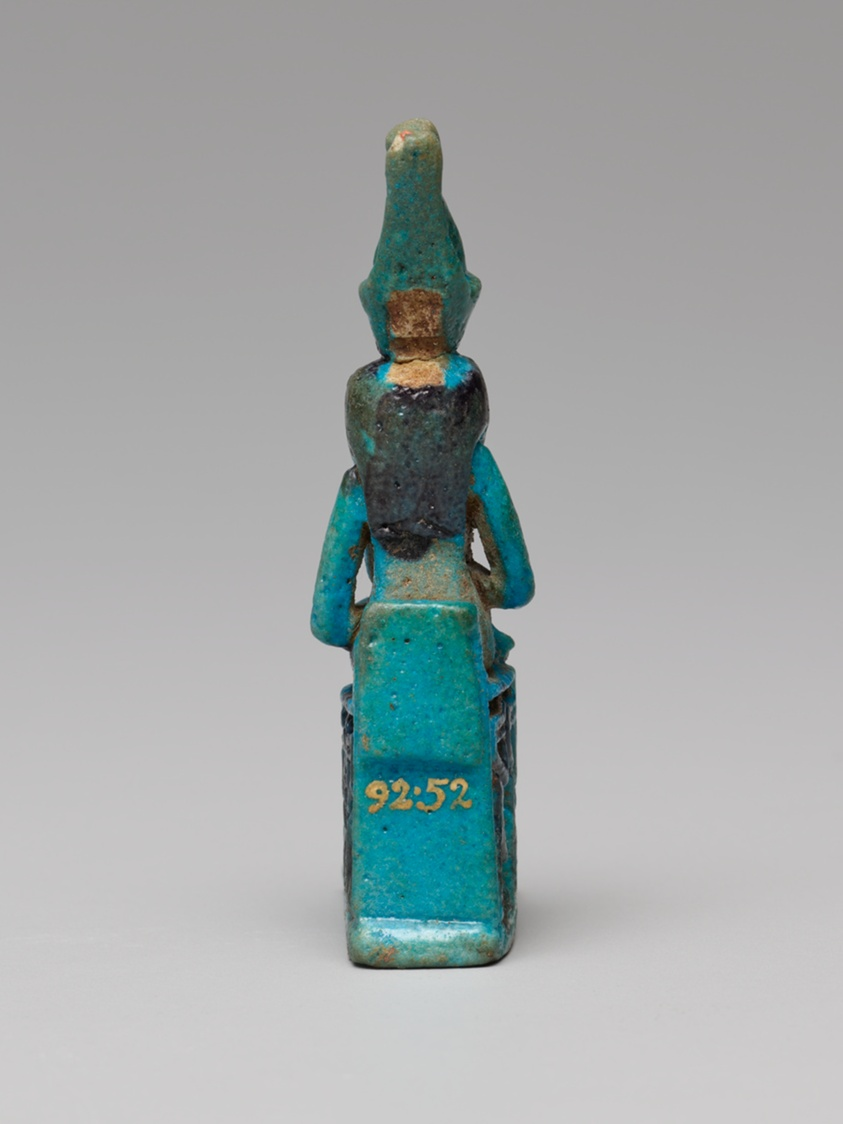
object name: Costume and Accessories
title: Amulet of Mut and Khonsu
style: third intermediate period, late period (egyptian), egyptian, ancient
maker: Egyptian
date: Third Intermediate Period (about 1069–664 BCE)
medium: Faience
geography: Egypt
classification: amulet; jewelry; ceramics; ancient art; costume; faïence (composite material)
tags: goddesses, children, gods (deities), nursing (breast feeding)